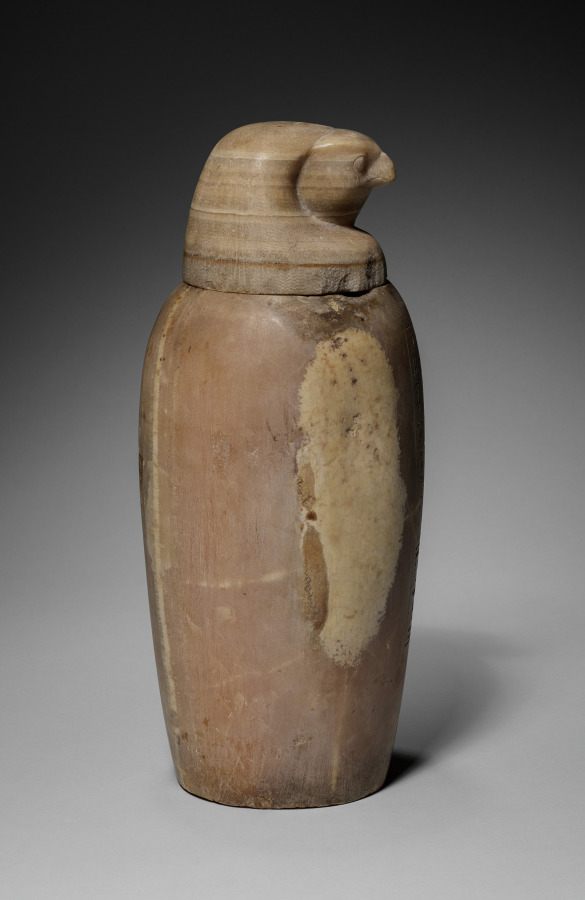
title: Canopic Jar with Falcon's Head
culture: Egypt, Late period (715–332 BCE), Dynasty 26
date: 664–525 BCE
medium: travertine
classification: Funerary Equipment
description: In the process of mummification, the liver, lungs, stomach, and intestines were removed, separately embalmed, and stored in specialized jars known as canopic jars (after a sailor in Greek mythology, who died at the town of Canopus in the Nile Delta and was worshipped there in the form of a human-headed jar). Each organ was identified with one of four funerary deities collectively known as the Sons of Horus: the liver with Imsety (man's head), the lungs with Hapy (baboon's head), the stomach with Duamutef (jackal's head), and the intestines with Qebehsenuef (falcon's head). It was their duty to protect the deceased and restore to him his body parts in the hereafter.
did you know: The falcon-headed deity Qebehsenuef protected the contents of this canopic jar. It contained the remains of the deceased's intestines, which were kept safe for the afterlife.